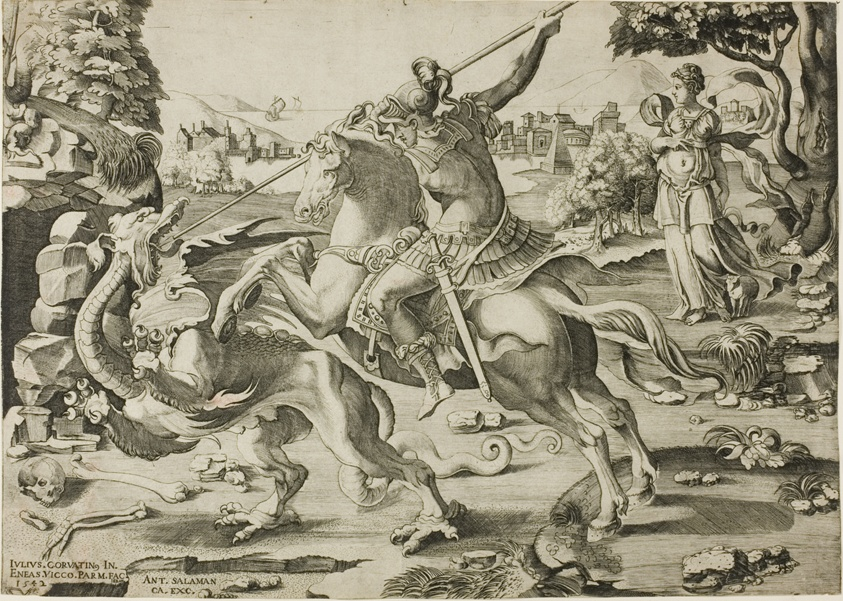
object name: Print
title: Saint George and the Dragon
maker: Enea Vico (Italian, 1523-1567); after Giulio Clovio (Croatian, active Italy, 1498–1578); published by Antonio Salamanca (Italian, 1478-1562)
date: 1542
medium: Engraving in black on buff laid paper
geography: Italy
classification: engraving; print; prints and drawing